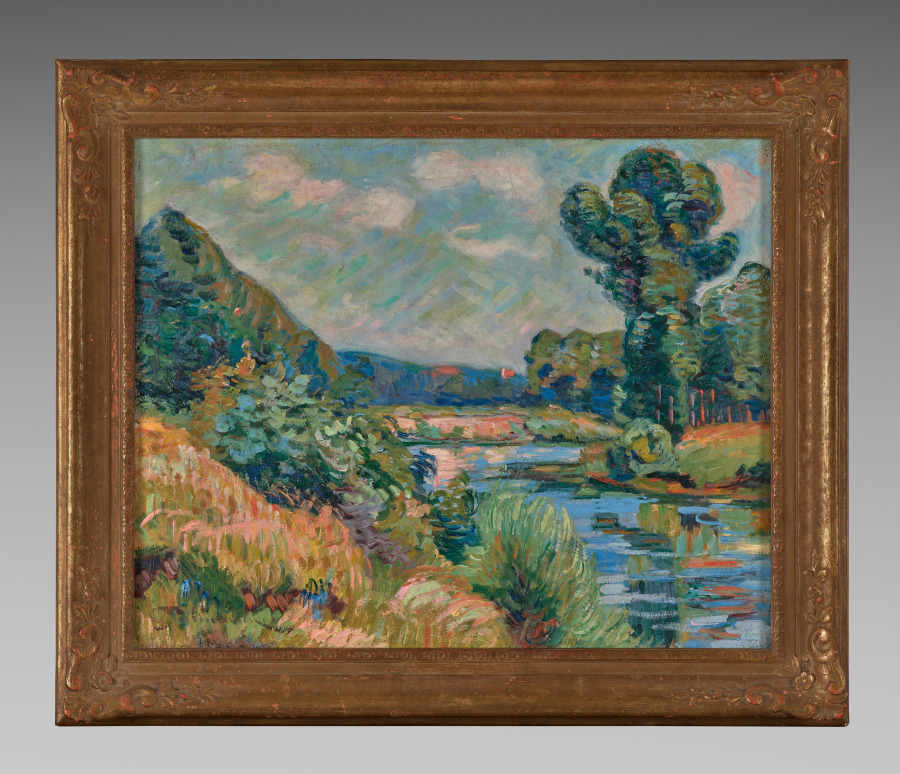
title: The Banks of the Marne at Charenton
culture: France, 19th century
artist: Armand Guillaumin (French, 1841–1927)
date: c. 1895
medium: oil on fabric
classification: Painting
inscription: Signed lower left: Guillaumin